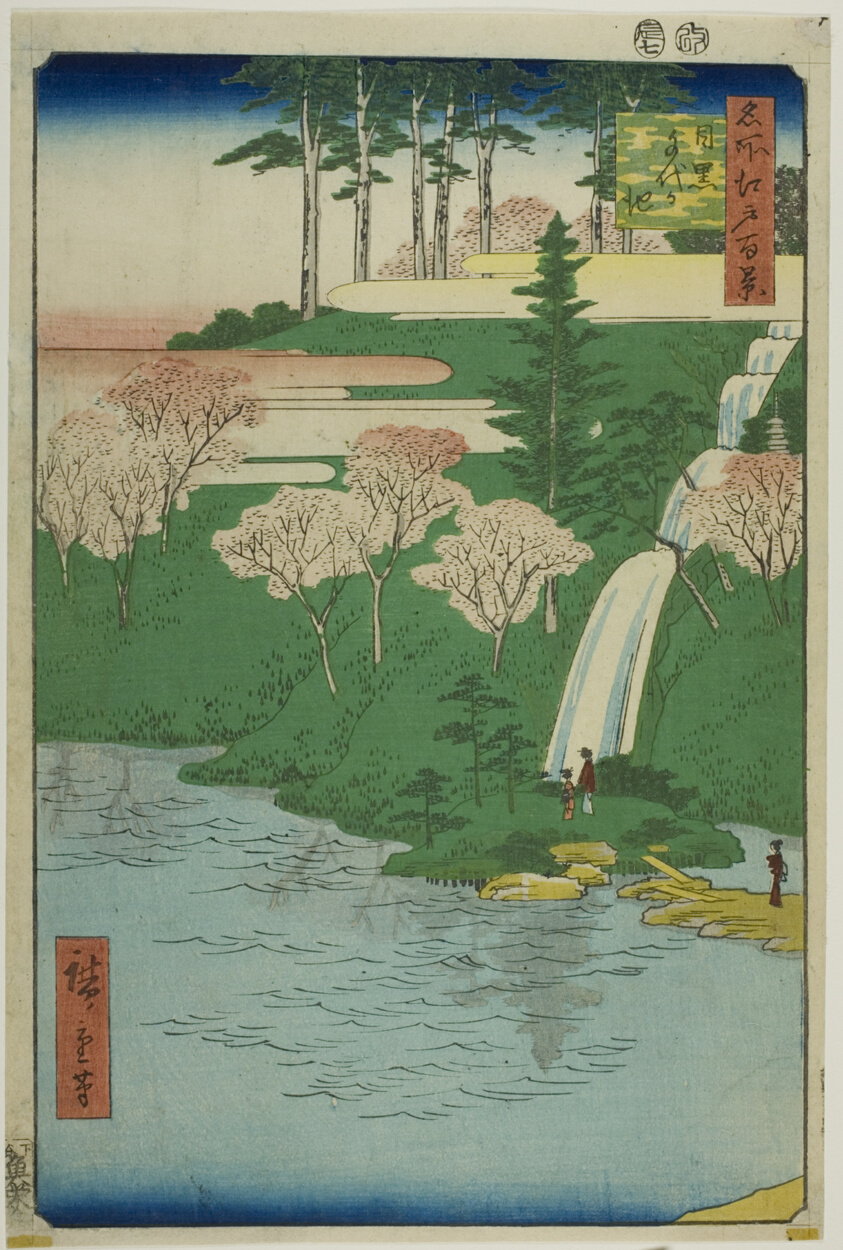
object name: Print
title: Chiyogaike Pond, Meguro (Meguro Chiyogaike), from the series "One Hundred Famous Views of Edo (Meisho Edo hyakkei)"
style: Japanese (culture or style)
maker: Utagawa Hiroshige 歌川 広重; Japanese, 1797–1858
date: 1856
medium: Color woodblock print; oban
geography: Japan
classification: woodblock print; print